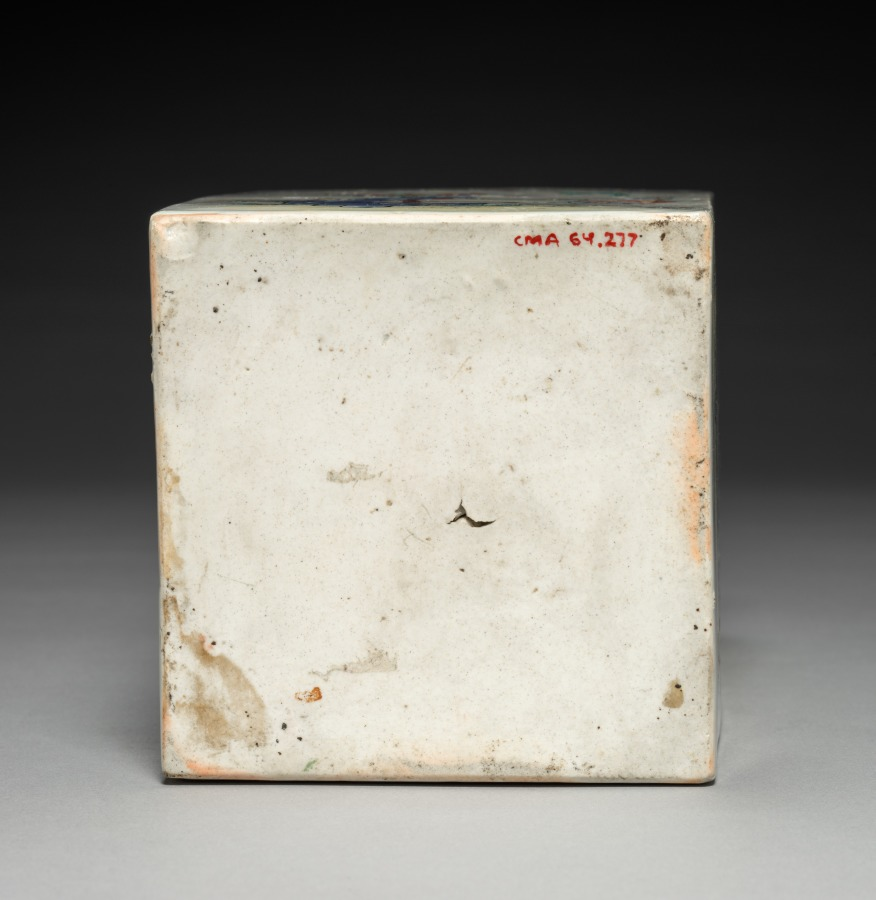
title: Square Jar with Birds and Flowers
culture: Japan, Edo period (1615–1868)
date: late 1600s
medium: Porcelain with overglaze color enamels and gold (Hizen ware, Kakiemon type)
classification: Ceramic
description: This lidded square jar was likely paired with a complementary yet nonidentical mate. The pine tree, plum, and bamboo together form the frequently depicted motif known as the Three Friends of Winter (shōchikubai), so named because of their hardy perseverance in the cold. Each side also features a pair of birds, including cranes on one face and pheasants on another.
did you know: A jar like this was fired at a high temperature, painted with colored enamels, and then fired again at a lower temperature.